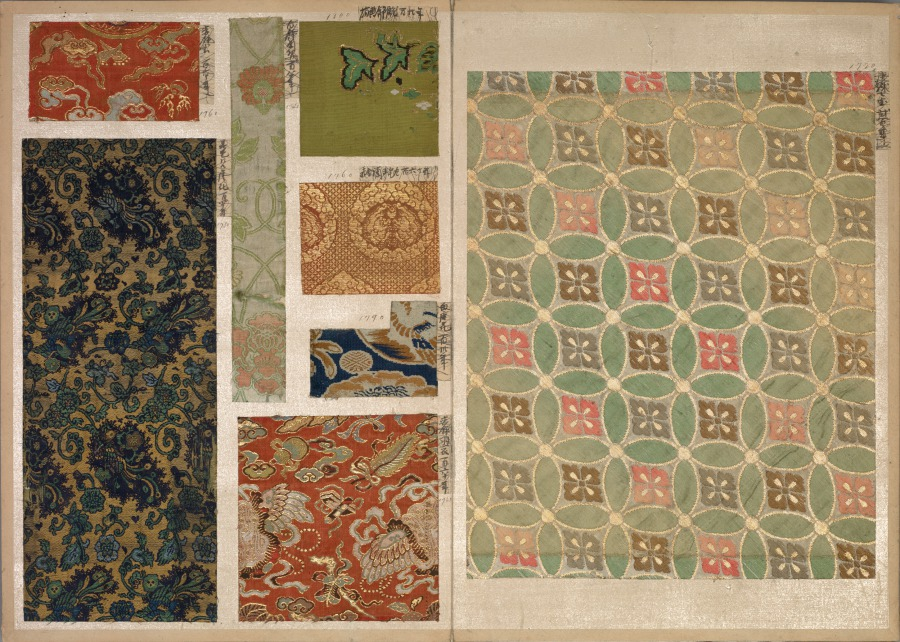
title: Album of Textile Samples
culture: Japan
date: 1790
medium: silk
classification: Textile